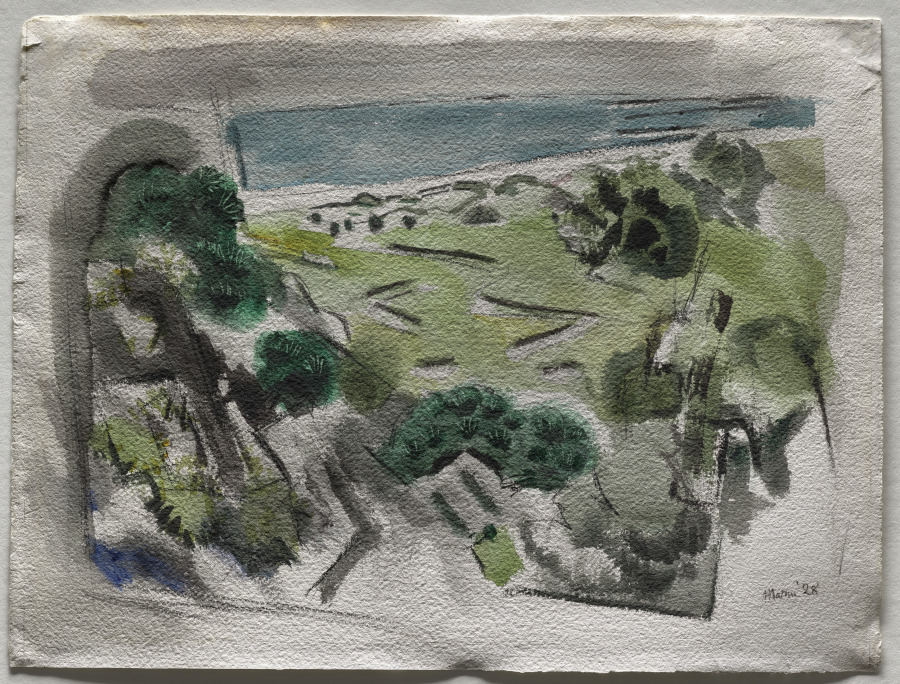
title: On Morse Mountain, No. 6, Maine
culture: America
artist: John Marin (American, 1870–1953)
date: 1928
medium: Watercolor and black crayon and reductive work with the end of paint brush on thick, moderately rough-textured wove paper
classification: Drawing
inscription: Recto, lower right: "Marin '28"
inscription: Written in pencil on verso: "On Morse Mountain/#6-28"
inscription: Written in pencil on verso: "No 5 (scribbled out in pencil)"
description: One of America's most important watercolor practitioners, John Marin spent every summer in Maine from 1914 through 1928, and the state's coastline became a central focus of his work. By the late 1920s, when this work was made, he was experimenting with bold black elements in his compositions and painted frames or borders. On Morse Mountain, No. 6, Maine shows Marin using dry charcoal to create areas of shocking black over which he layered inky black wash. The technique has the effect of framing the image and leading the eye toward the center. With its strikingly different character from other works made in Maine in 1914 (see 2020.134, 2020.136, 2020.137, 2020.138, 2020.139), the work shows how John Marin repeatedly challenged himself as well as the medium of watercolor with improvisations in color, paint handling, perspective, and movement.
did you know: John Marin made this watercolor during one of the last summers he would spend in Maine, at a time when he called most of the watercolors he executed "Movements in Paint."